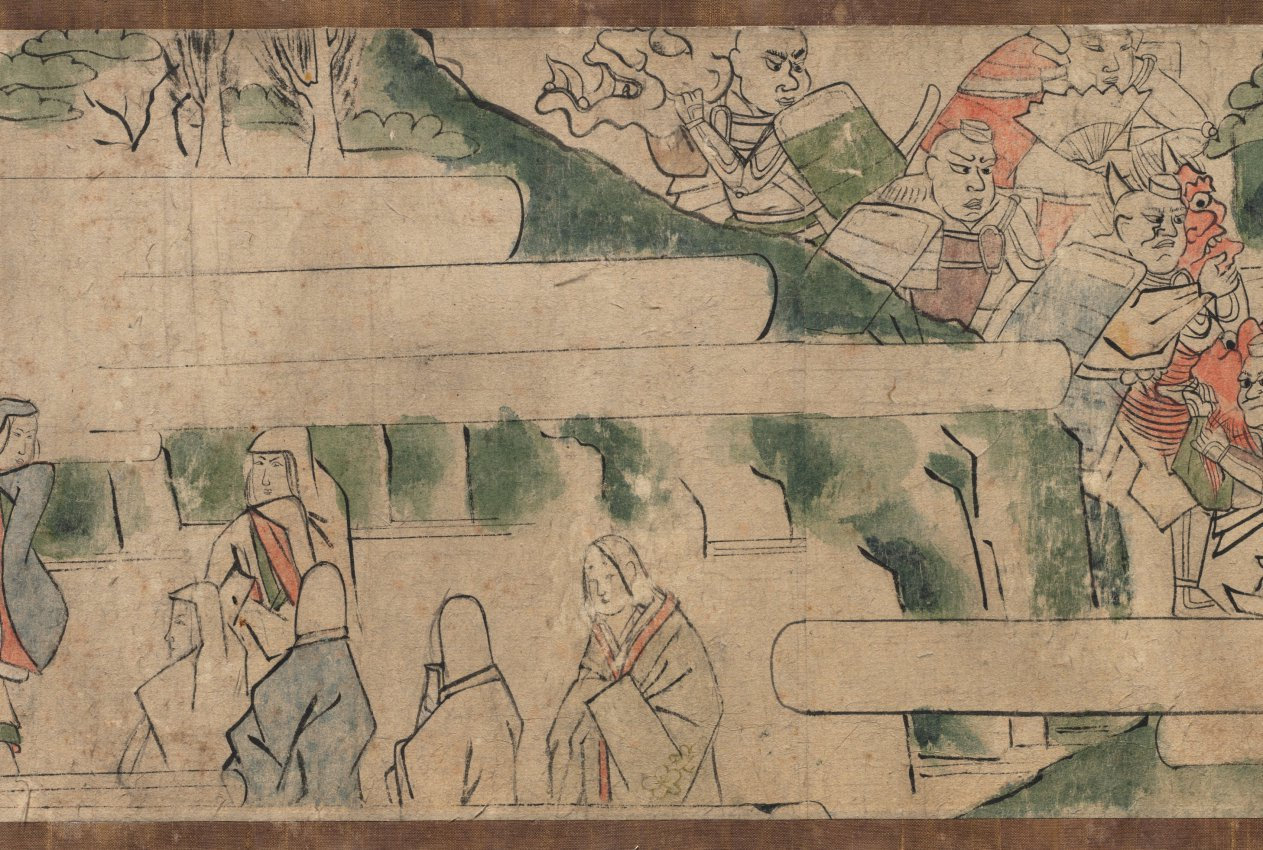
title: Oeyama Engi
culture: Japan, Edo period (1615–1868)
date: 1615–1868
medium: one of a pair of handscrolls; ink and color on paper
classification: Painting